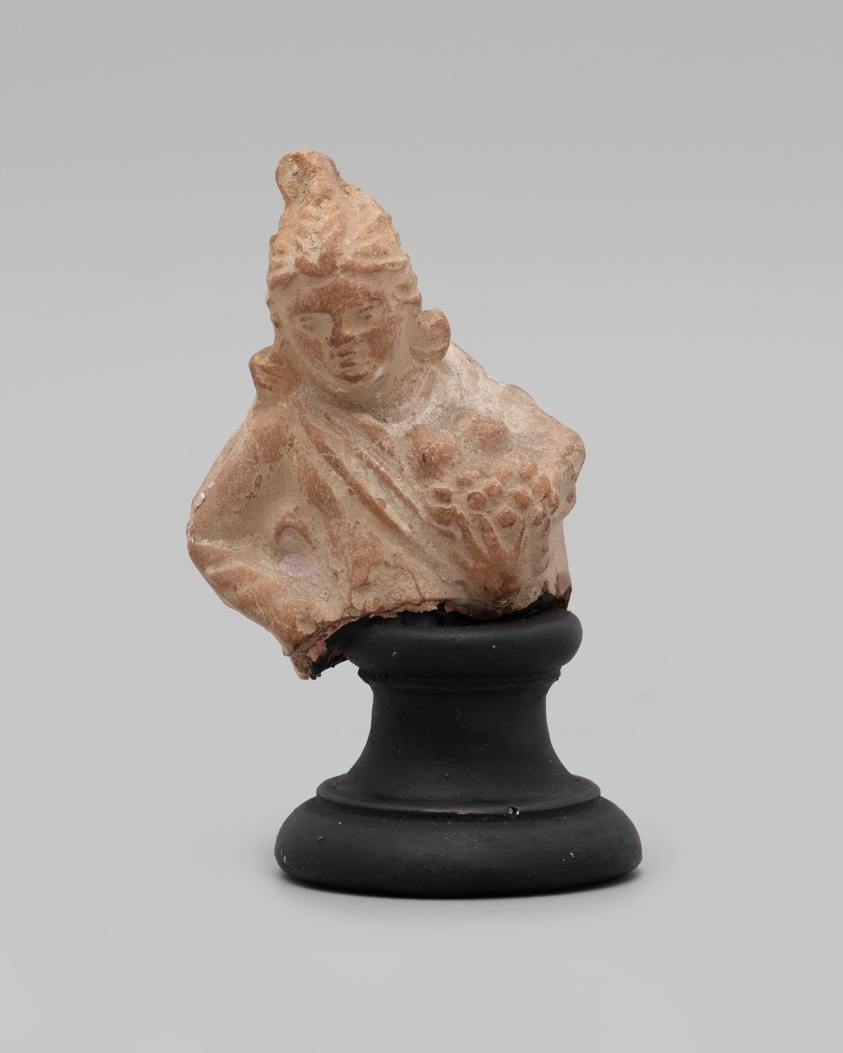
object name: Sculpture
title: Torso of a Child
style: greek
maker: Greek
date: 2nd-1st century BCE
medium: terracotta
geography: Greece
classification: earthenware; ceramics; sculpture; ancient art